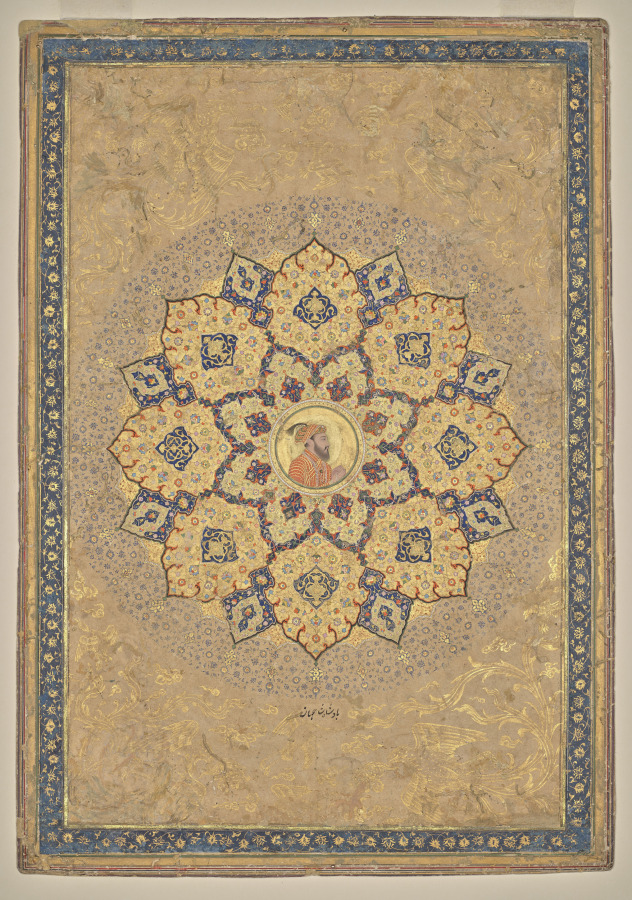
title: Shamsa (sunburst) with portrait of Aurangzeb (1618–1707), from the Emperor's Album (the Kevorkian Album)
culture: India, Mughal court, made for Shah Jahan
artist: probably by Bichitr (Indian, active c. 1615–50)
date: illumination 1640–55; original portrait c. 1640–50; altered after 1658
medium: Gum tempera and gold on paper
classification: Painting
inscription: inscribed below Shamsa: Padshah Jahan; inscribed below portrait : 'amal-i Bichitr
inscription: Persian inscription below shamsa (sunburst), in nasta‘liq script: Great King Shah Jahan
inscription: Persian inscription below portrait, in nasta‘liq script: the work of Bichitr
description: This closing page of an imperial Mughal album originally had the shamsa, or sunburst, with a plain gold disc in the center, referencing the light of God as divine sanction for Emperor Shah Jahan’s rule. The depiction of divine light by means of floral and geometric patterns was painted by hand with mathematical precision in gold and lapis lazuli. The portrait of Aurangzeb was probably added when he took over the imperial library after seizing the throne from his father, Shah Jahan, in 1658 and adopting the name Alamgir, which means “Seizer of the Universe.” The string of prayer beads in his right hand points to his extreme religious orthodoxy, which dramatically altered the culture of the Mughal court from what had previously been an openly ecumenical center.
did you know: Tooling the gold cloud motif with pinpricks makes it catch more light and shimmer.